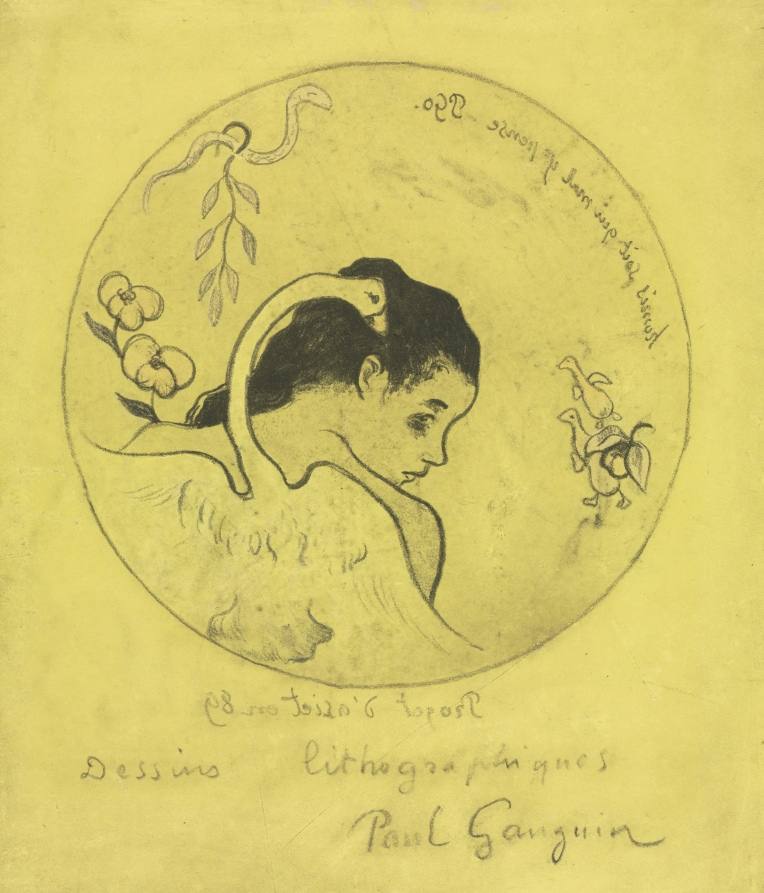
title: Volpini Suite: Design for a Plate: Leda and the Swan (Projet d'Assiette: Léda et le Cygne)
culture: France, 19th century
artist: Paul Gauguin (French, 1848–1903)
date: 1889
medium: zincograph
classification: Print